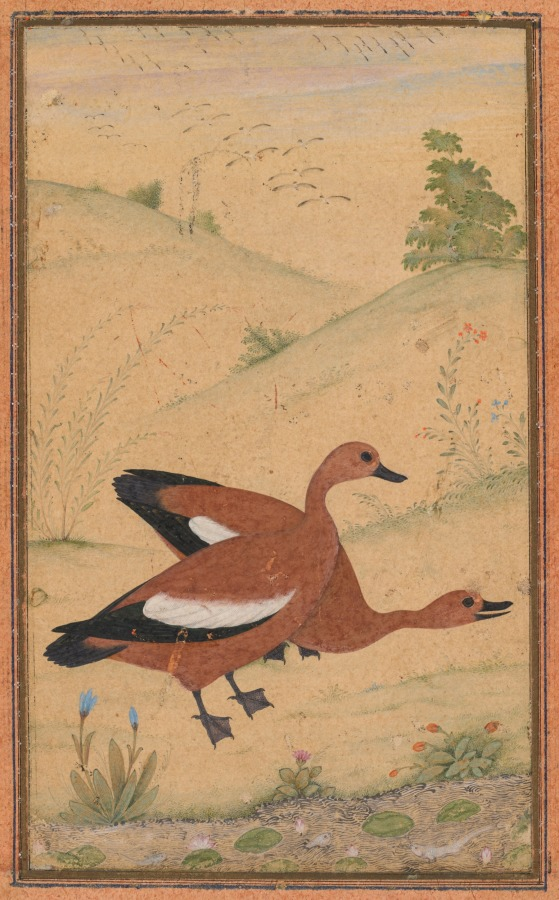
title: A pair of Brahminy ducks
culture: India, Mughal, 16th century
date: c. 1595; borders added probably 1800s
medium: Gum tempera on paper, mounted with later pink and blue borders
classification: Painting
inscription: Inscription above painting, Arabic numerals: 38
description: The Brahminy duck, also known as the ruddy shelduck, can be found throughout Southern Europe, North Africa, and Southeast Asia. This painting accurately depicts the orange coloring of Brahminy ducks and the patches of white on their wings. They are also recognizable by their long legs and short bills. The level of detail in realistic paintings of animals like this one suggests that Mughal artists studied live subjects, such as the waterfowl that lived in Mughal palace gardens.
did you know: Delicate dots articulate the texture of webbed feet and toothy row in the beak.